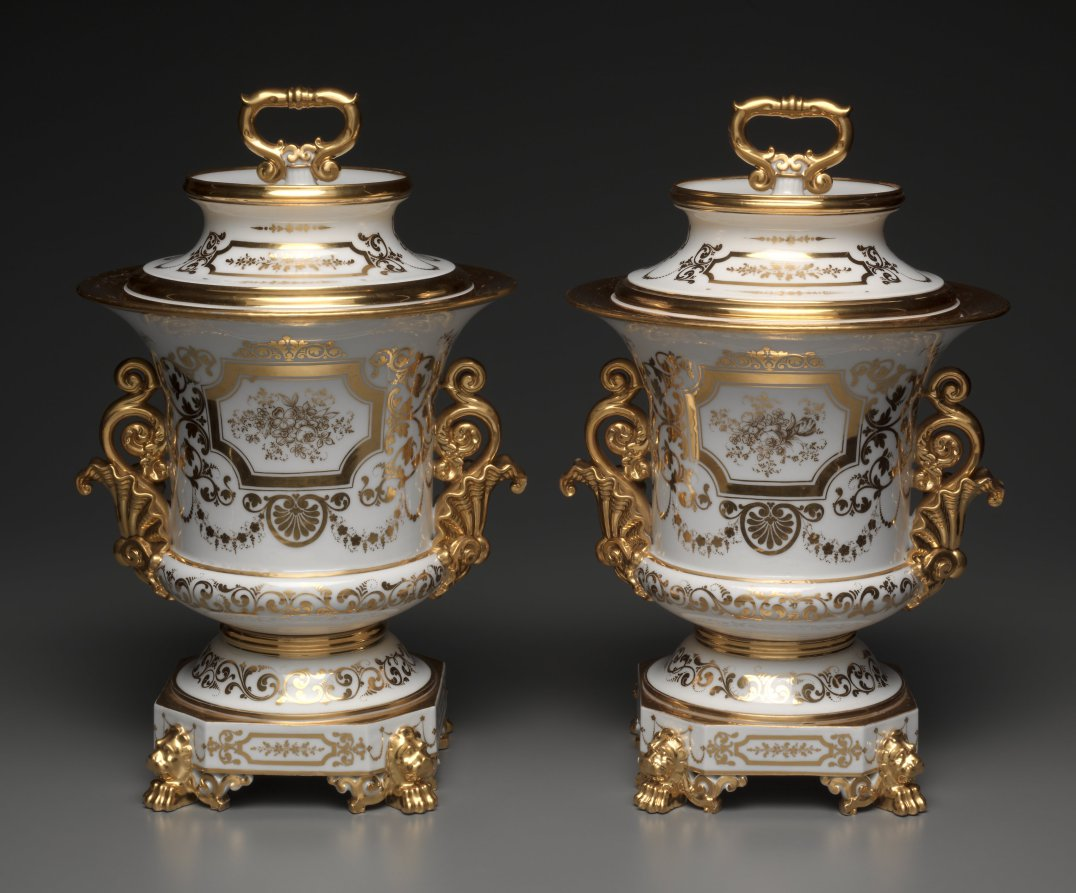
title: Pair of Covered Ice Cream Pails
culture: France, Paris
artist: Factory of Jacob-Petit (French, 1830–1865)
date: c. 1840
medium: gilt porcelain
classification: Ceramic